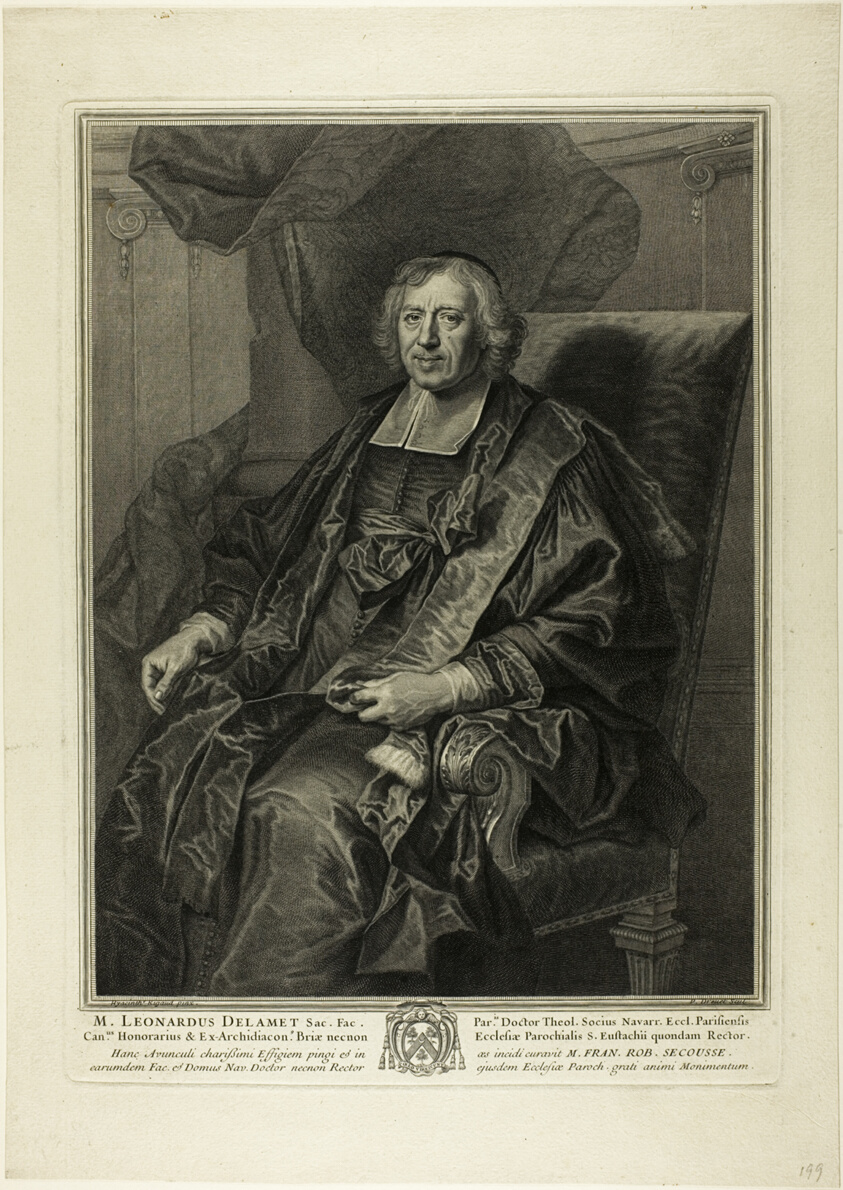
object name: Print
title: Portrait of Léonard de Lamet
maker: Pierre Drevet (French, 1663-1738); after Hyacinthe Rigaud (French, 1659-1743)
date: c. 1699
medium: Engraving on ivory laid paper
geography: France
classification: engraving; print; prints and drawing